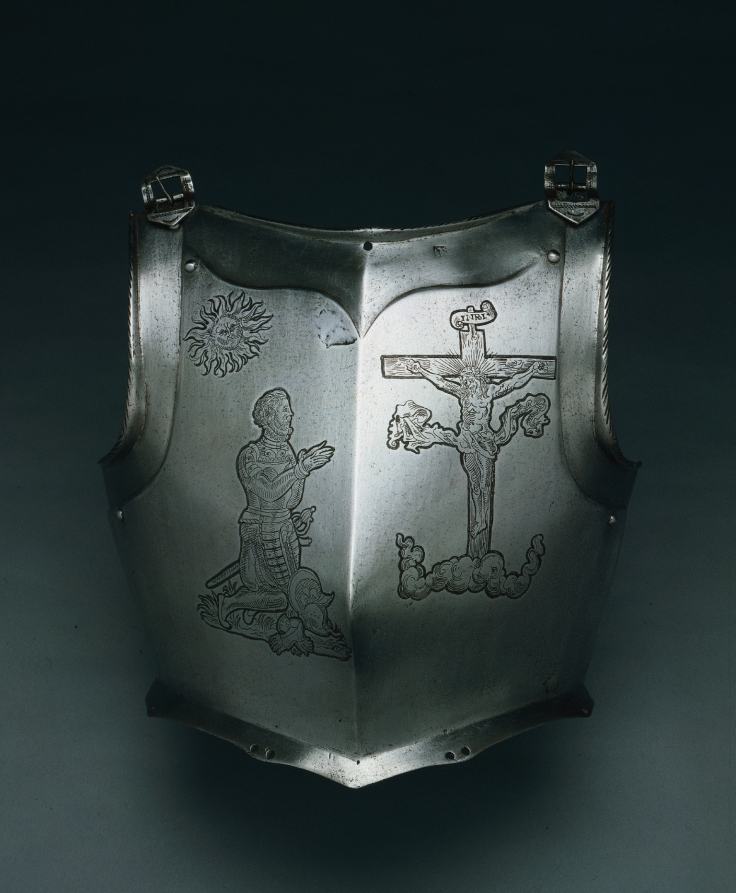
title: Breastplate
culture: Germany, Nuremberg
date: c. 1550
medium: steel with etched figure kneeling before Crucifixion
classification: Arms and Armor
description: This breastplate, lacking its tassets, is nonetheless a fine example of the superb sculptural forms achieved by Renaissance armorers. Its contours and glancing surface illustrate the extremes sought by both armorers and patrons in order to deflect projectiles such as crossbow bolts and thrusting lances. Embellishment was an important aspect of fine armor. This breastplate bears a fine etched decoration of a kneeling knight, possibly the armor's owner, before the Crucifixion. This may have created a kind of personalized devotional image for use in combat.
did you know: Engraving is one of the oldest techniques for decorating metal objects; here the artist used a sharp instrument to scratch the design into the surface.